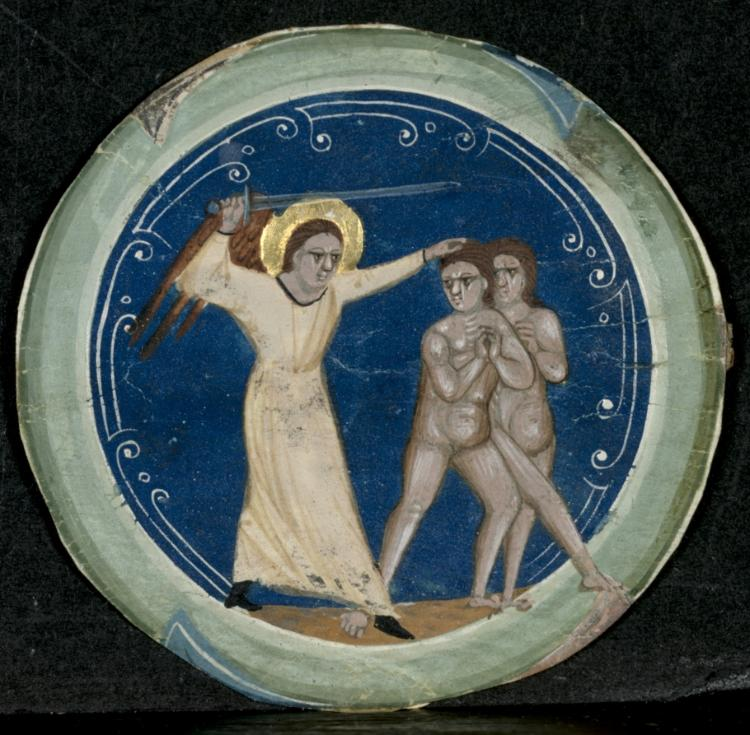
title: Medallion from the Border of a Latin Bible: The Expulsion of Adam and Eve from Paradise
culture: Italy, early 14th century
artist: Primo Miniatore di San Domenico (Italian)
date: early 1300s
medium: tempera on vellum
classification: Manuscript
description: As revealed by their subjects and blank versos (reverse sides), these medallions were undoubtedly excised from a Genesis page in a large lectern Bible. Typically, such medallions would have appeared in conjunction with a large-scale historiated initial I running the full length of the text and introducing the book of Genesis: In principio creativit Deus caelum et terram (In the beginning God created heaven and earth). Such schemes of page layout and decoration were common features of Bibles produced in Bolognese workshops and destined for wealthy religious institutions of the Emilian region, for which Bologna was the artistic and intellectual center.